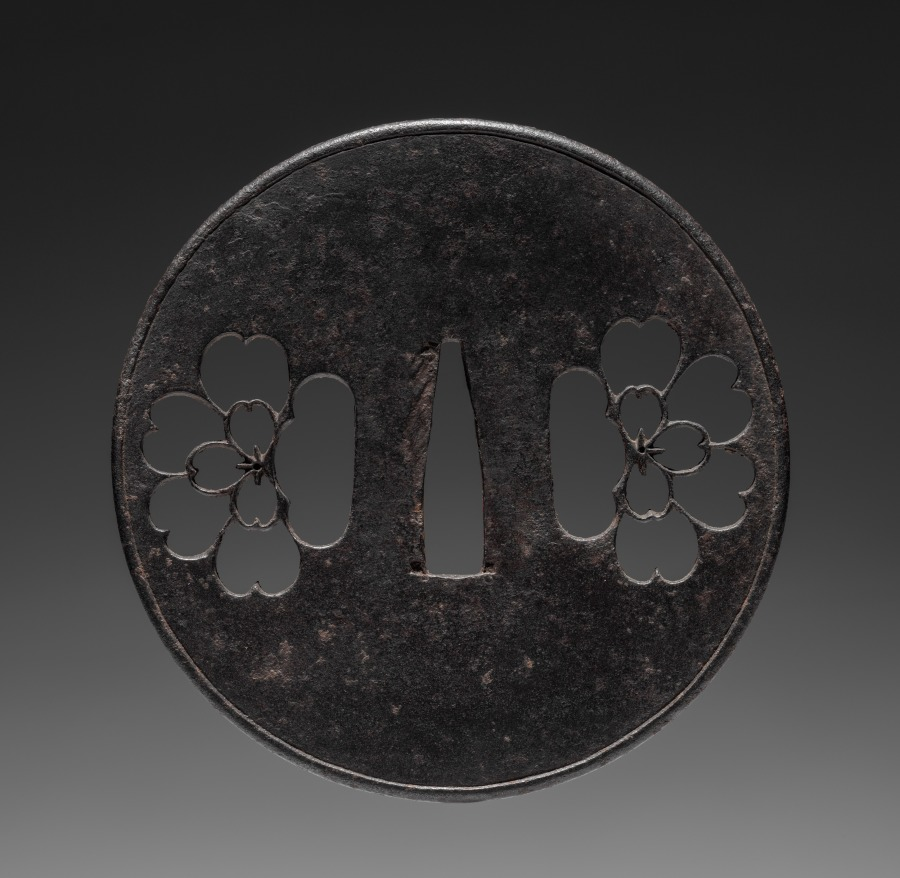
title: Sword Guard (Tsuba)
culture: Japan, possibly Edo period (1615-1868)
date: c. 1615–1868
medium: iron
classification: Arms and Armor